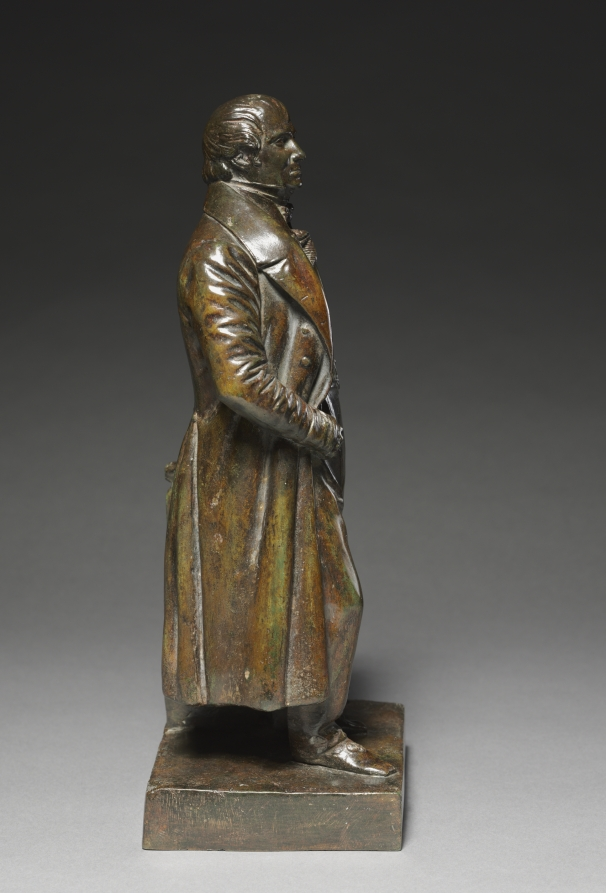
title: Portrait of Jean-Pierre-Joseph Darcet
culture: France, 19th century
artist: James Pradier (Swiss, 1790–1852)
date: 1834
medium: bronze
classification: Sculpture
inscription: signed an dated: "J. Pradier/ 1834"